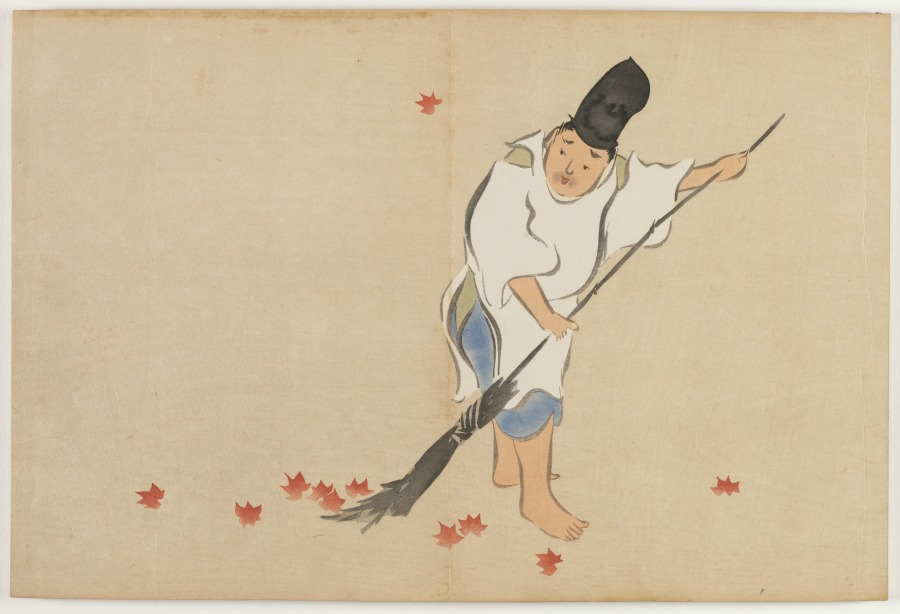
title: Flowers of a Hundred Worlds (Momoyogusa): Court Guard (Eishi)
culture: Japan, Meiji period (1868–1912)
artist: Kamisaka Sekka (Japanese, 1866–1942)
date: 1909–10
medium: color woodcuts with gold and silver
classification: Bound Volume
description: This print from a set of three woodblock printed albums displays the graphic design prowess of Kamisaka Sekka. The images were first distributed one by one to subscribers to the series but later were reissued in bound form, like this book, for mass consumers. Each print features a vignette taken from nature or Japanese literature. Many of the scenes have a long history in Japan, originating in the 900s or 1000s and having been interpreted by all manner of artists since that time. Sekka’s selections hew closely to precedents from the Rinpa style originated by painter Tawaraya Sōtatsu (c. 1570–c. 1640) and calligrapher Hon’ami Kōetsu (1558–1637).